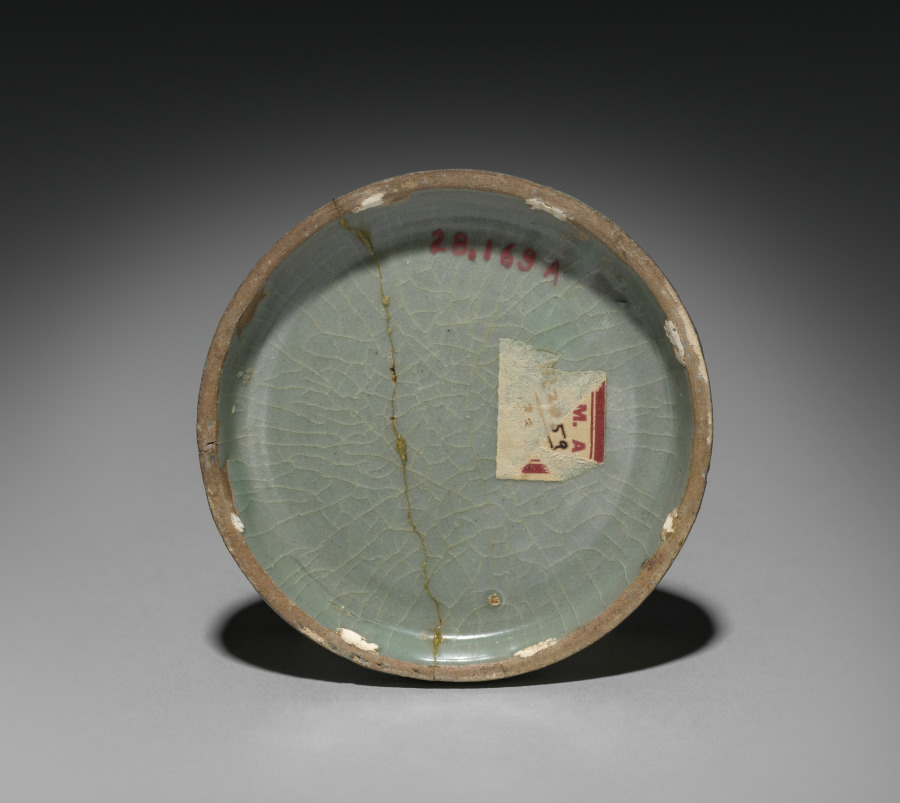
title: Cover with Chrysanthemum and Scroll Design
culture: Korea, Goryeo dynasty (918–1392)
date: 918–1392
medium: inlaid celadon ware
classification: Ceramic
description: Celadons, spoons, seals, and bronze mirrors were the most common burial objects in tombs during the Goryeo period (918–1392). Once used to contain colored powder, rouge, and eyebrow gel for makeup, this small container was one of the standard goods that furnished elites' tombs. Both women and men used the grain powder of rice or millet for whitening their skin, safflower extract for rouge, and plant ash or soot for eyebrow gel. Yet, natural-looking makeup seems to have been the most favorable one in Korea according to the travelogue by Xu Jing (1091–1153), the Chinese diplomat who visited Korea in 1123.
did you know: This ceramic container was used to store either incense or cosmetics.